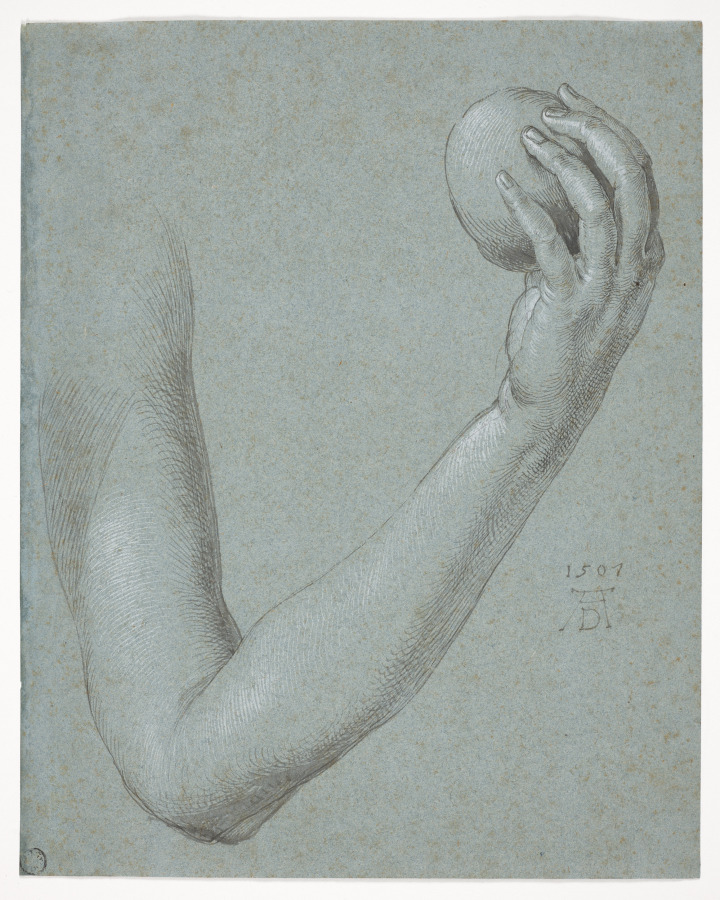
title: Arm of Eve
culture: Germany, Nuremberg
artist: Albrecht Dürer (German, 1471–1528)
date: 1507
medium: point of brush and gray and black wash, brush and gray and black wash, heightened with white gouache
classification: Drawing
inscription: signed, center right, in gray ink: 1507 / [artist monogram: AD]; verso, lower left, in graphite: Nro 24. F 13 z. [bn?] 10zgL.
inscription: Watermark: Anchor (similar to Briquet 461)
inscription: "franck / 828" in graphite, center verso (Lugt 946)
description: Arm of Eve is the only surviving preparatory drawing for Dürer’s life-size panels of Adam and Eve in the Museo del Prado, Madrid. It is also one of the few surviving drawings by the artist made on Venetian blue paper, a support he began to use for his chiaroscuro studies while visiting Venice in the winter of 1506–7. With extraordinary economy of means, using only black and gray ink and a limited amount of wash and gouache for shading and heightening, Dürer suggested the grace and balance of the complete human form in this composition of a disembodied arm and hand. Such a study of a hand in ideal proportions cannot help but suggest the hand of the artist, a self-referential nod to his own abilities.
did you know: The blue paper that Dürer used to make this drawing was a specialty of Venetian paper makers in the 16th century, who achieved the color by infusing the paper pulp with dyed fibers.